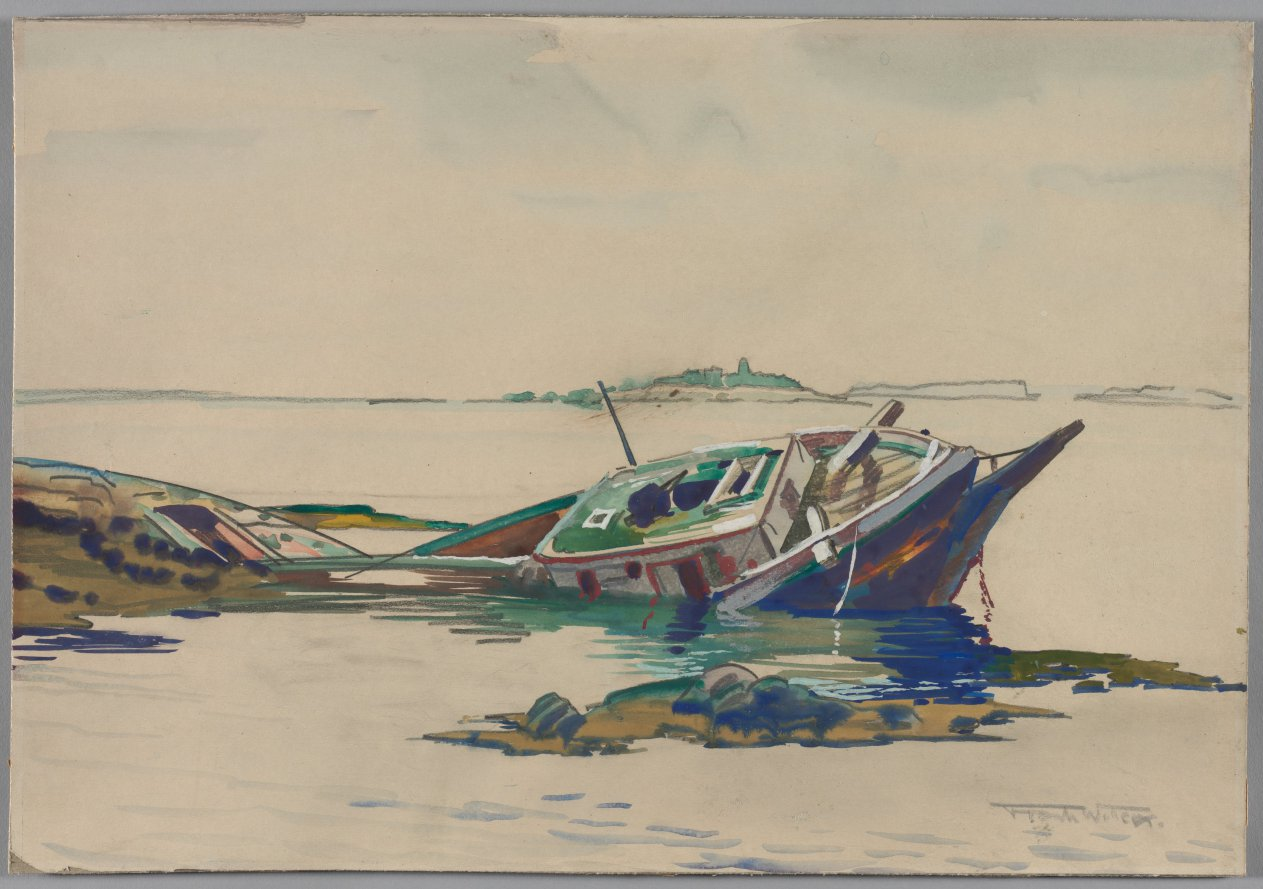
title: The Wreck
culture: America, Ohio, Cleveland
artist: Frank Wilcox (American, 1887–1964)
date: 1923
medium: watercolor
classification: Drawing